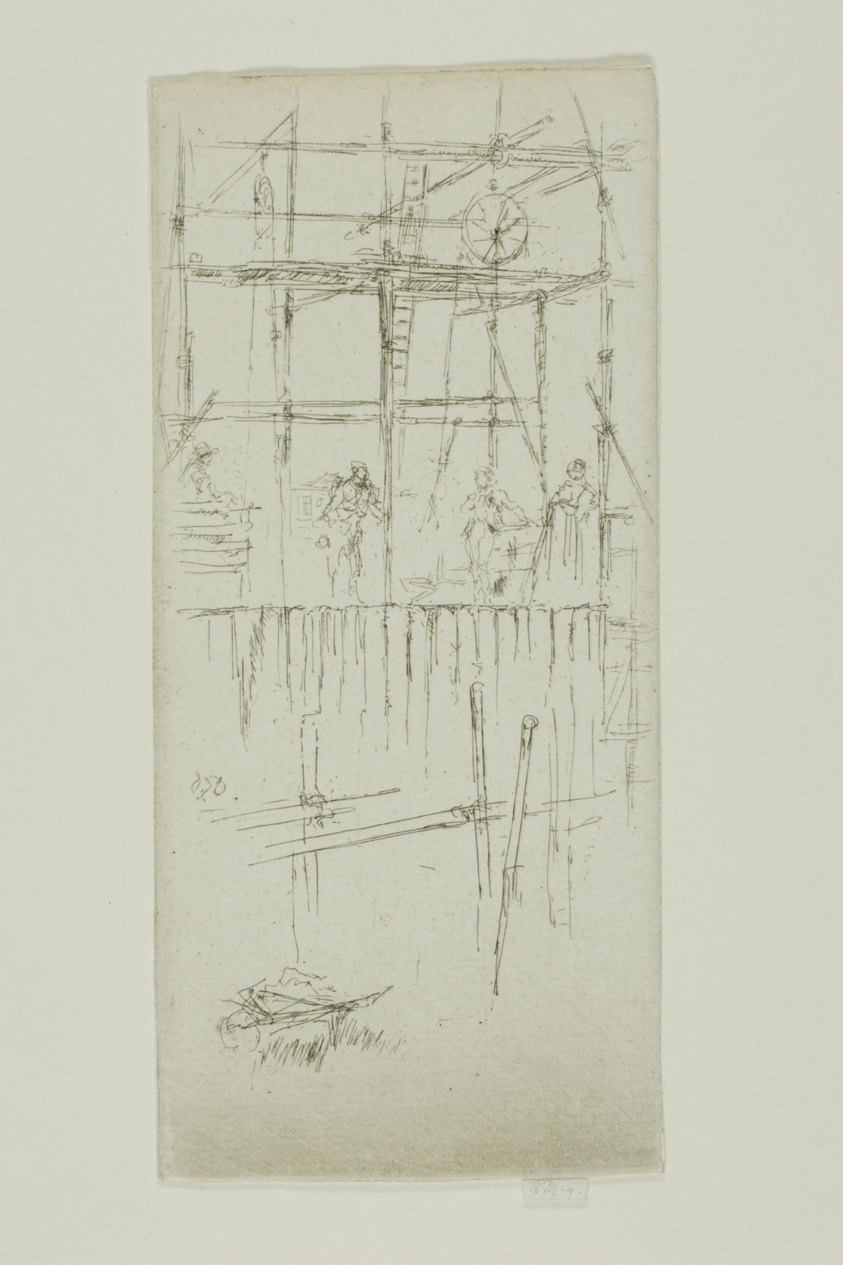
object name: Print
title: Savoy Scaffolding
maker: James McNeill Whistler (American, 1834-1903)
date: 1887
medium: Etching in black ink on off-white laid paper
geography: United States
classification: etching; print; prints and drawing; paper